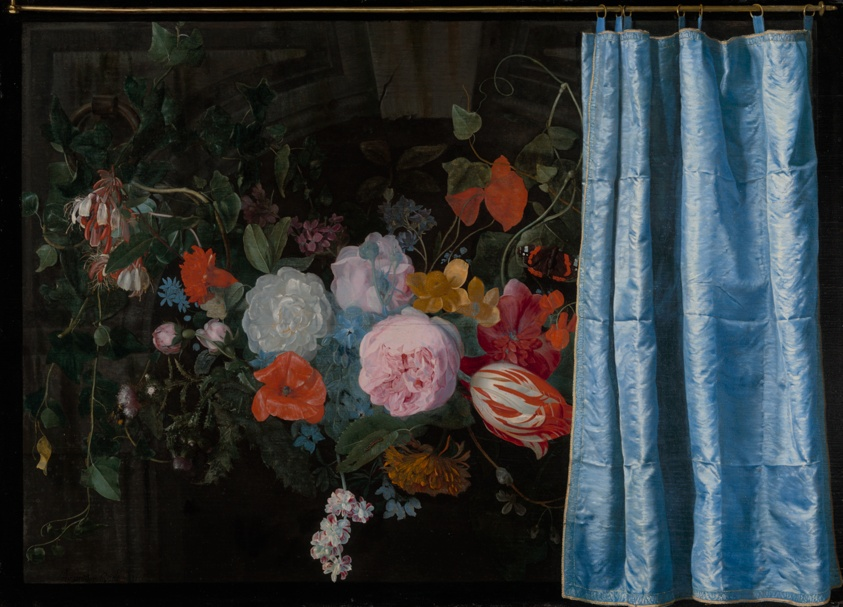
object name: Painting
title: Trompe-l'Oeil Still Life with a Flower Garland and a Curtain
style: 17th Century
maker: Adriaen van der Spelt (Dutch, 1630–1673); Frans van Mieris (Dutch, 1635–1681)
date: 1658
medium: Oil on panel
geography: Netherlands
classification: oil on panel; paint; still life; painting; european painting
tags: still life, curtains, flowers